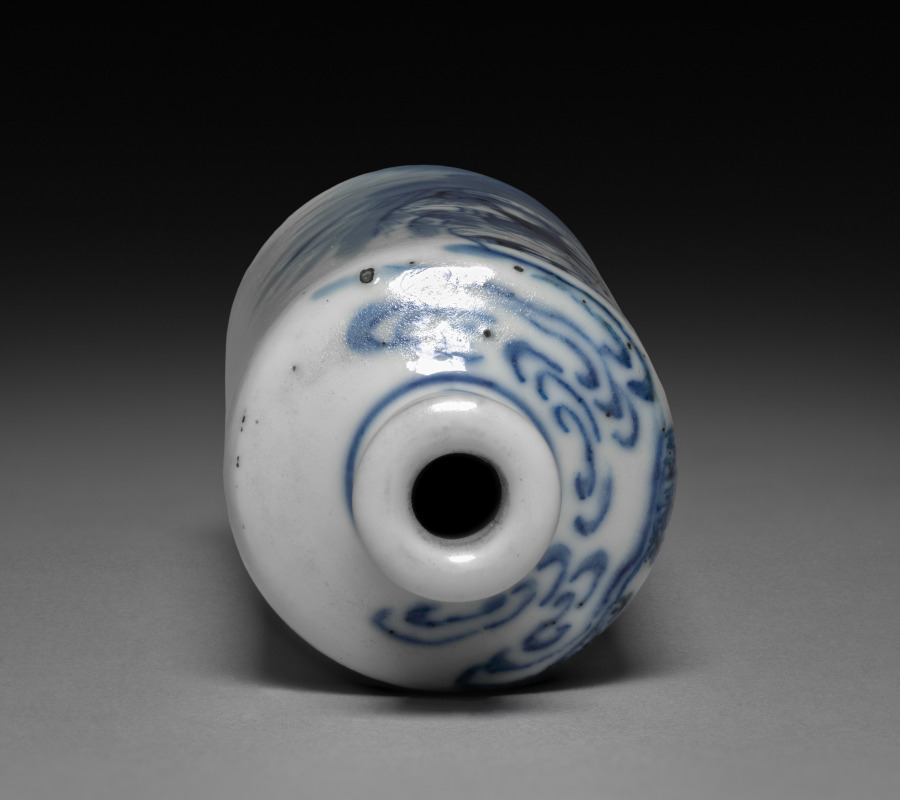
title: Blue and White Snuff Bottle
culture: China, Qing dynasty (1644-1911), Kangxi reign (1661-1722)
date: 1661–1722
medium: porcelain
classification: Ceramic